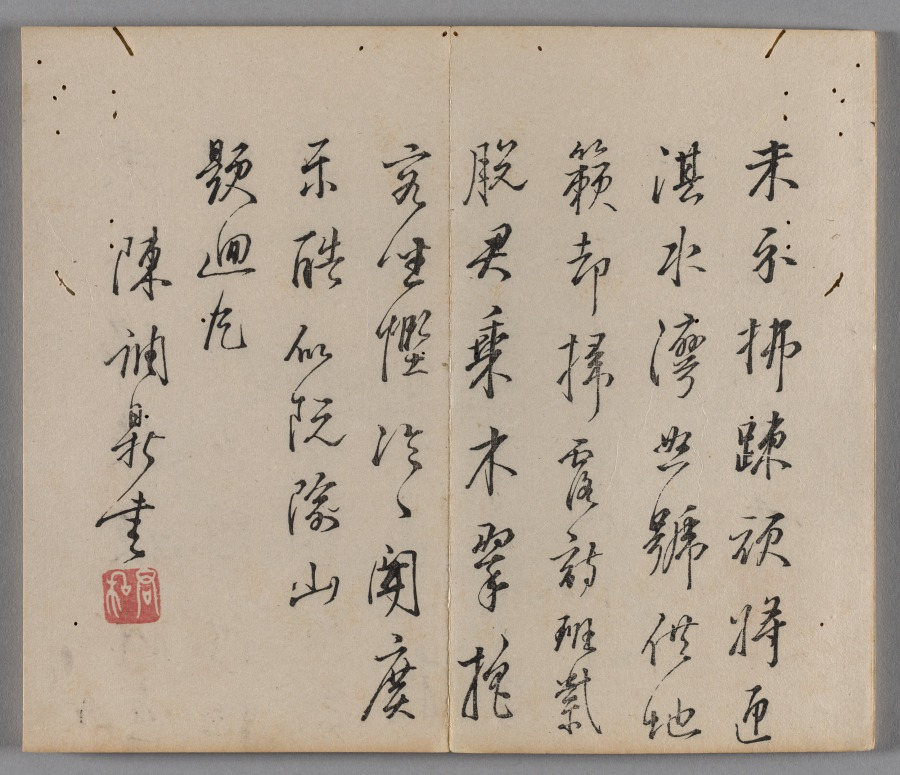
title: Ten Bamboo Studio Painting and Calligraphy Handbook (Shizhuzhai shuhua pu): Bamboo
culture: China, Qing dynasty (1644-1911)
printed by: Hu Zhengyan (Chinese, c. 1584–1674)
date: 1633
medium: Woodblock-printed book; ink and colors on paper; first edition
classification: Print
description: Color printing reached a level of perfection in the early 1600s, as seen in this Ten Bamboo Studio Collection of Calligraphy and Painting and the Mustard Seed Garden Manual of Painting (printed 1679 and 1701). The painterly quality, precision in registering (aligning) the woodblocks, and harmonious colors made them the most successful color print editions in Chinese history. Both editions were printed and compiled in Nanjing, spread nationwide, and had a great impact on the arts in Japan and Korea.